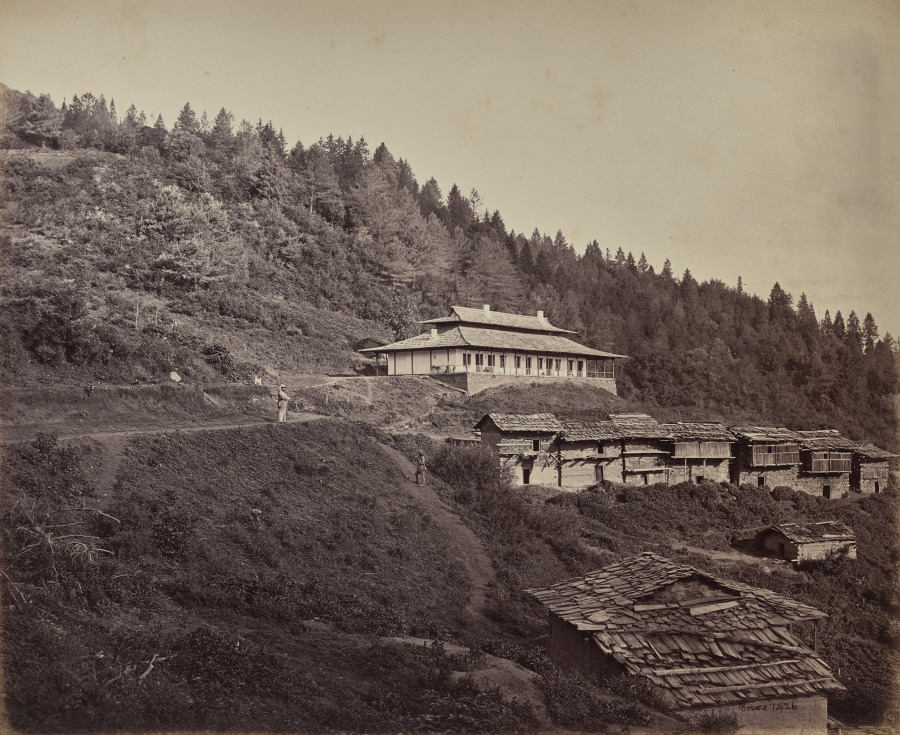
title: The Upper Himmalayahs. Village of Harkundu with Traveller's Bungalow in Rest-House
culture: England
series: Photographs of Northern India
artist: Samuel Bourne (British, 1834–1912)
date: 1863–70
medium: albumen print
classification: Photograph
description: The 50 images in this album, all taken in the 1860s, move from the hill towns of the Himalayas down to cities including Lahore (now in Pakistan), Delhi, Lucknow, Agra, Benares (now Varansi), and Calcutta (now Kolkata). Architectural studies of major monuments offer valuable historical records of what sites such as the Taj Mahal and the imperial mosque of the Mughal emperors in Delhi looked like before twentieth-century restorations.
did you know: Samuel Bourne, the author of most the images in this album, was a banker in England before he moved to India to become a professional photographer.